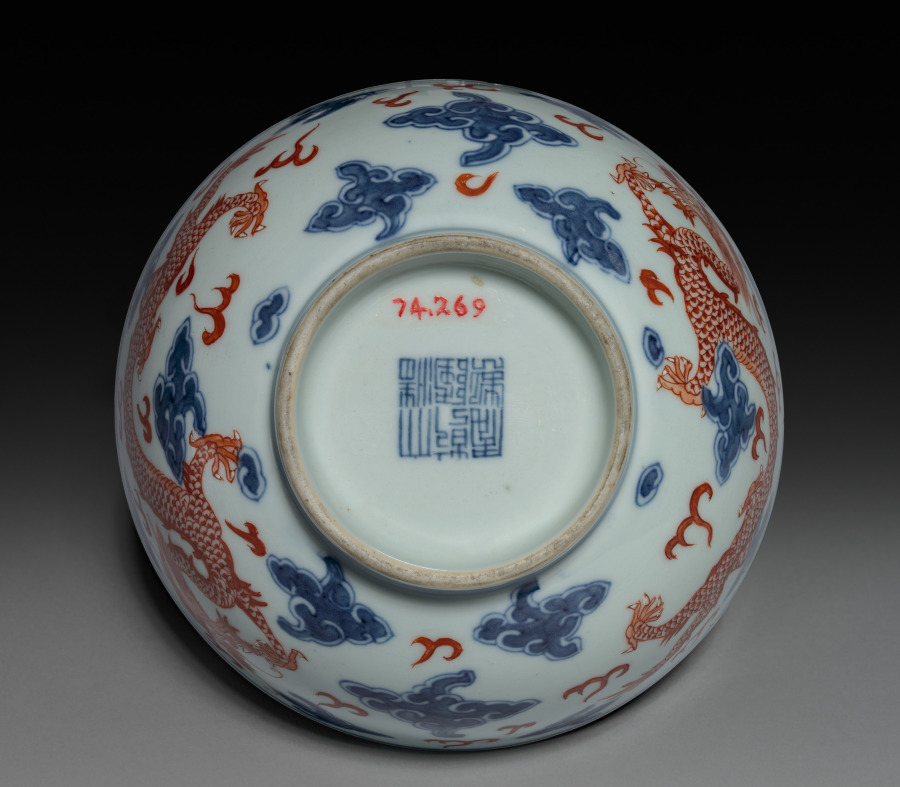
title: Bowl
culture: China, Qing dynasty (1644-1911), Qianlong mark and reign (1736-95)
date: 1736–95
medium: porcelain with overglaze red and underglaze blue enamel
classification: Ceramic